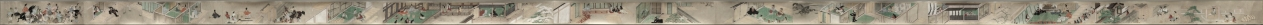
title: The Saltmaker's Story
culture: Japan, Edo period (1615–1868)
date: early 1600s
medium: One of a pair of handscrolls; ink, color, and gold on paper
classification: Painting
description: Once read and copied by girls at New Year’s celebrations and included in dowries, The Saltmaker’s Story is a rags-to-riches tale in which daughters are gifts from the gods. Despite his simple outlook, the main character progresses from humble roots as an associate at Kashima Shrine to the elite status of grandfather of the emperor through the intervention of the Kashima deity. The Saltmaker’s Story is traditionally presented in a set of three scrolls, but the text of this set has been removed by a previous owner, who remounted the illustrations as a pair. The paintings of this one take us from right to left through the second half of the tale.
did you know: This handscroll originally had texts before its paintings, but the texts were removed.